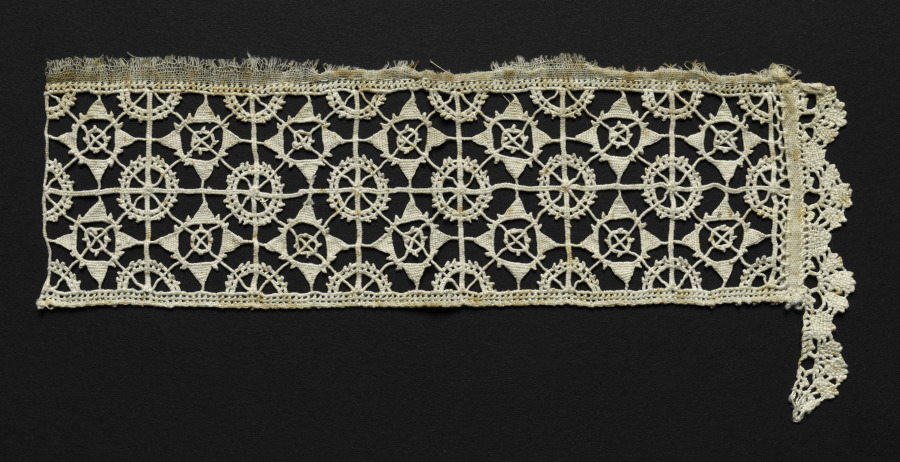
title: Lace Fragment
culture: Italy, Venice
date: 1500s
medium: Linen: needle lace, reticella insertion and bobbin lace edging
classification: Lace